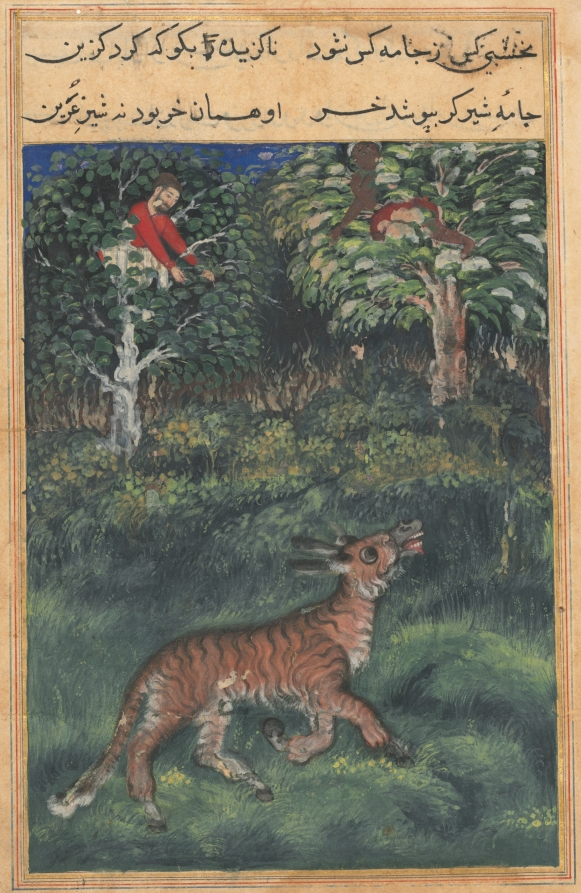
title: The donkey, in a tiger’s skin, reveals his identity by braying aloud, from a Tuti-nama (Tales of a Parrot): Thirty-first Night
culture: Mughal India, court of Akbar (reigned 1556–1605)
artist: attributed to Basavana (Indian, active c. 1560–1600)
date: c. 1560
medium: gum tempera, ink, and gold on paper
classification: Painting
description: This painting illustrates a story about a merchant who owned a donkey but did not have enough money to feed him. He was able to secure a tiger’s skin, in which he dressed his donkey at night, so he could forage freely in fields, frightening away the owners’ watchmen, seen here scrambling up in trees for safety. He succeeded for a time and grew fat and healthy, until a nearby donkey brayed, and he instinctively answered, revealing his true identity.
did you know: The complex brushwork, soft grass, and furry tiger’s skin are characteristics of the artist Basavana’s distinctive style.